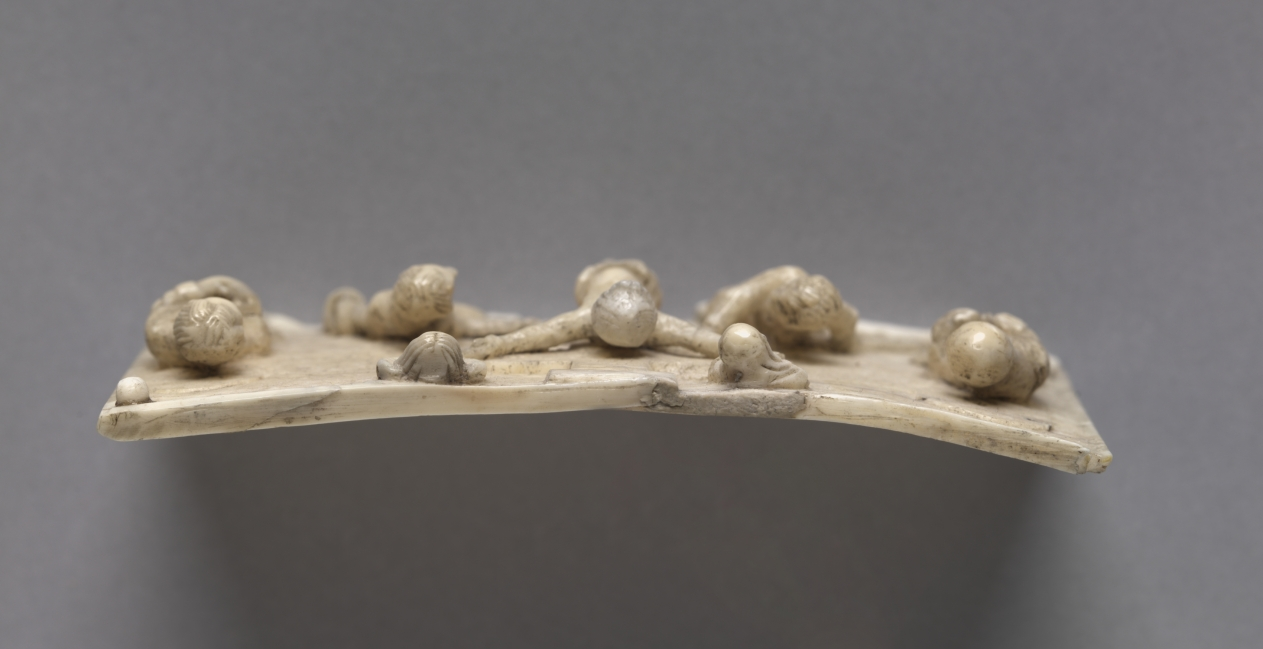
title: Plaque from a Portable Altar Showing the Crucifixion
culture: Germany, Lower Rhine Valley, Romanesque period, 11th century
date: 1050–1100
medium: walrus ivory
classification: Ivory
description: These intricately carved ivory panels once decorated the sides of a portable altar. Three of the plaques, those depicting Christ in Majesty and his apostles, were the first major acquisition of William M. Milliken, the museum's first curator of decorative arts and later director (1930–58). They were purchased from Emile Rey, the New York partner of Arnold Seligmann, Rey and Company, who had been closely associated with J. P. Morgan, Henry Walters, and other important American collectors. The fourth plaque, depicting the Crucifixion, was donated by Arnold Seligmann, Rey and Company later the same year. As Milliken later recalled, the pieces Rey showed him "were immensely intriguing, monumental in scale, even if tiny in size, the Christ in the Mandorla could have been enlarged and would have graced the tympanum of a great cathedral. . . . These morse [that is, walrus] ivories overwhelmed me . . . Somehow they must come to Cleveland. How was the question. Yet they would and must."